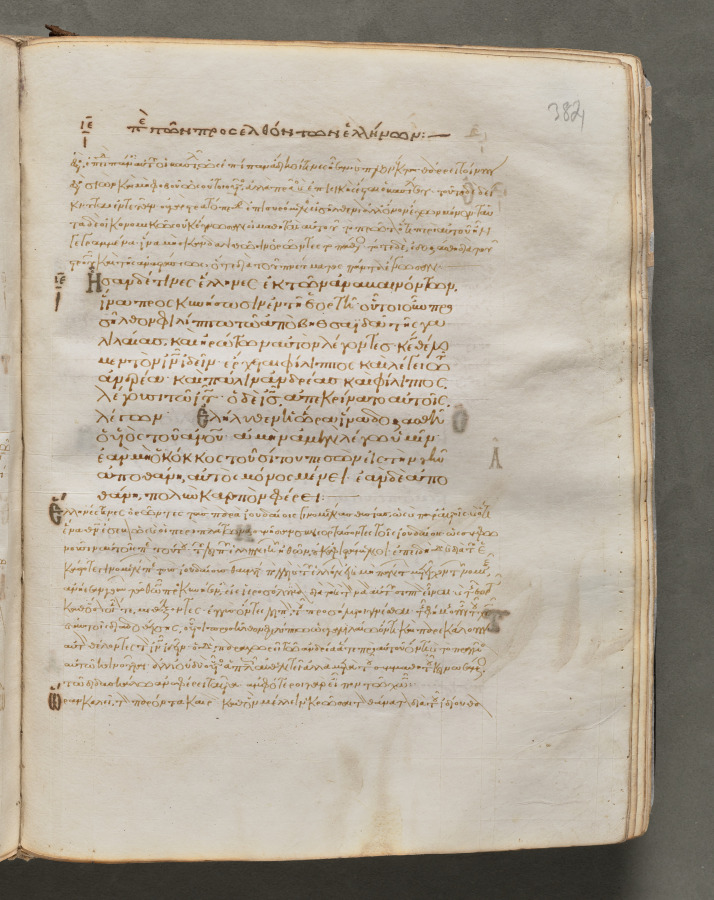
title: Text, folio 384 (recto), from a Gospel Book with Commentaries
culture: Byzantium, Constantinople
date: c. 1000–1100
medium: ink, tempera, and gold on vellum; leather binding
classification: Bound Volume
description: Each of the four gospels in this book opens on a page with brilliantly illuminated borders depicting the author of the text as well as birds—principally peacocks, symbols of the immortality of the soul—and fountains, representing the fountain of life and the salvation of the soul. This volume consists of 428 leaves with texts in Greek. Its level of sophistication suggests that it was probably written and decorated in a monastery in Constantinople.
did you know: Gospel books were carried in procession through Byzantine churches.